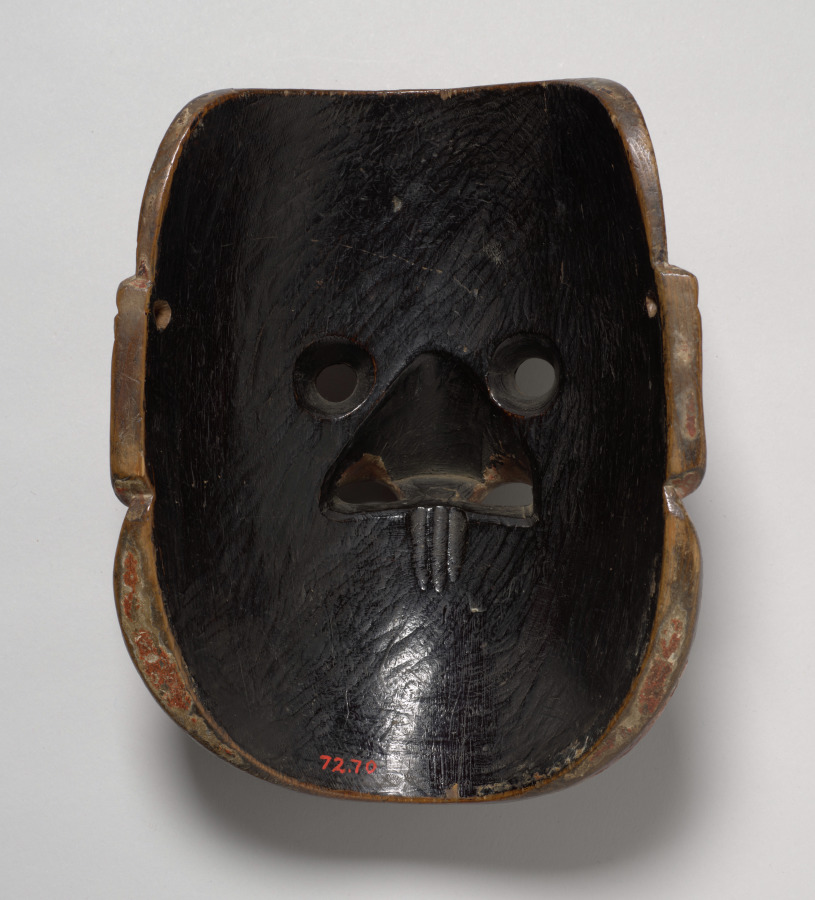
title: Noh Mask: Ko-beshimi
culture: Japan, Muromachi period (1392–1573)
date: 1392–1573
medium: wood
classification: Sculpture